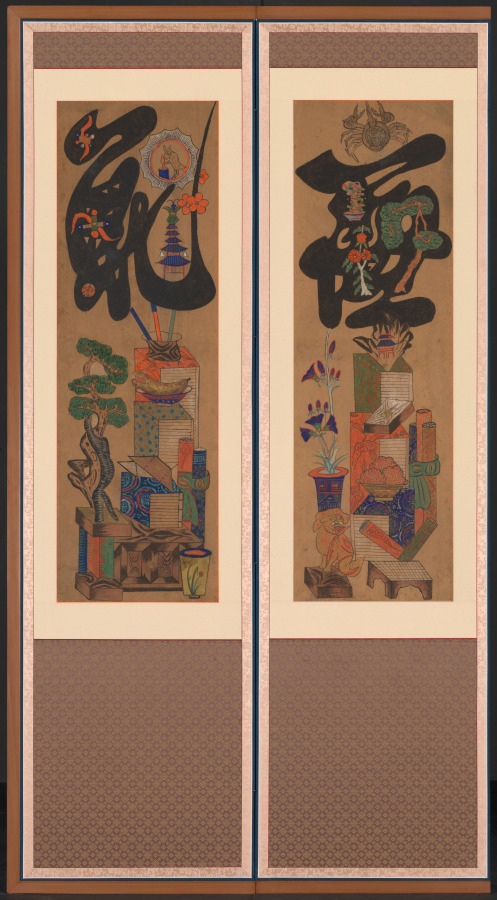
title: Munja-Chaekgeori Screen (Character-Books Screen)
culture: Korea, Joseon dynasty (1392–1910)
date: early 1900s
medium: Eight-panel folding screen, ink on paper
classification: Painting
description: This folding screen is a whimsical harmony of two different subjects: chaekgeori, or books and things; and munja, or characters. The lower section of each panel depicts the imagery of things, including books, decorative arts, and utilitarian objects. The upper portion of each panel bears a classical Chinese character. Read from far right to left, the eight characters refer to the values of Confucian teachings of the Joseon dynasty: filial piety, brotherly love, loyalty, trust, propriety, righteousness, modesty, and humility. While these two pictorial genres are harmoniously conjoined on the same picture plane, two sharply contrasting world views—urban consumerism and traditional Confucian ethics that despise materialism—compete with one another.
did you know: The eight Korean characters each mean filial piety, brotherly love, loyalty, trust, propriety, righteousness or justice, modesty or integrity, and humility or the feeling of shame.